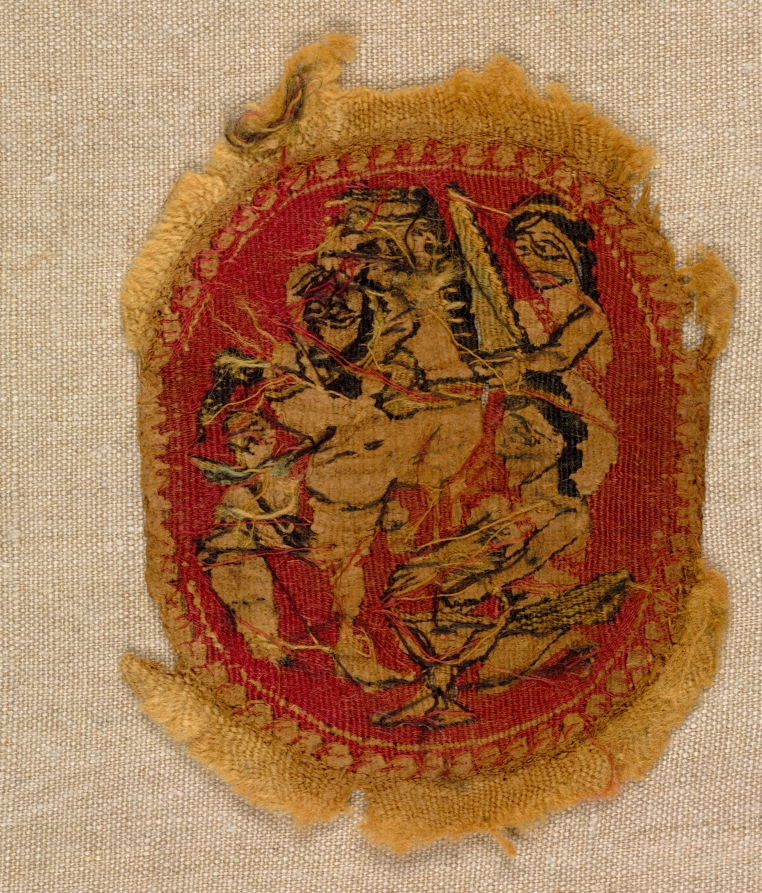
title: Five Round Segmenta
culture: Egypt, Umayyad period (661–750)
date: 650 – 750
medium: tapestry weave: wool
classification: Textile